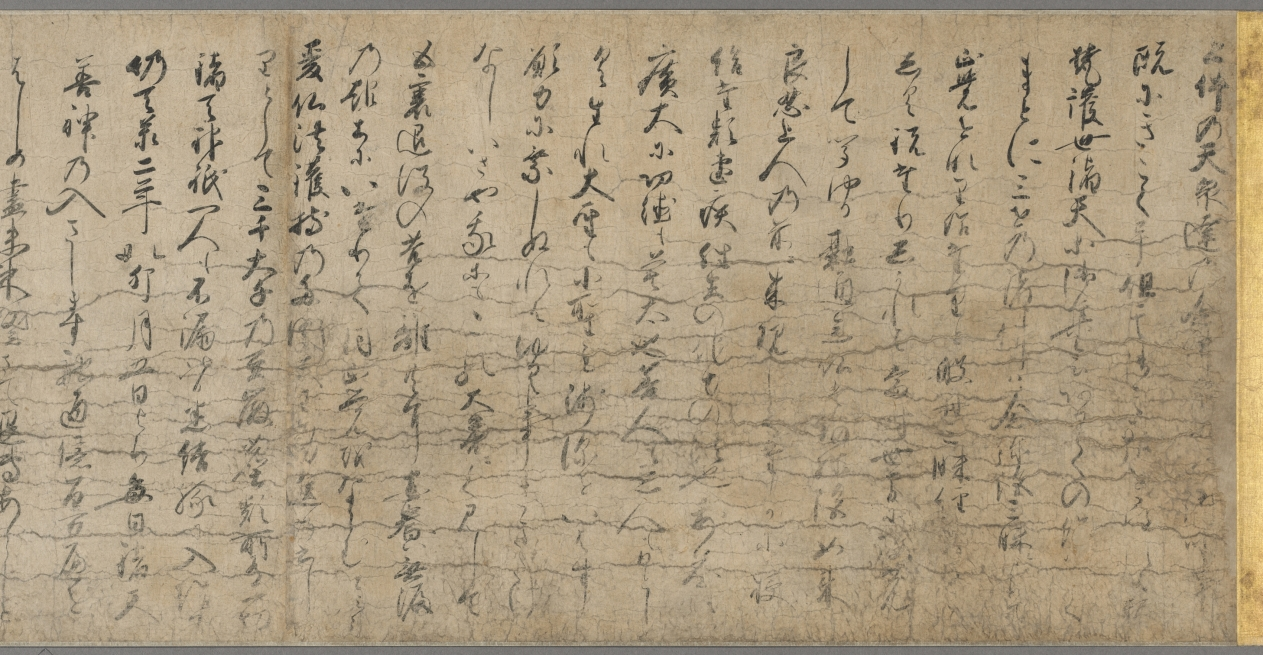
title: The Illustrated Miraculous Origins of the Yūzū Nenbutsu School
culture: Japan, Kamakura period (1185–1333)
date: early 1300s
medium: Handscroll; ink, color, and gold on paper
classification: Painting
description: This painting is the second of a set of two illustrated handscrolls. The first scroll depicts the biography of the Japanese Buddhist monk Ryōnin. This scroll begins with scenes of Ryōnin’s death and relates episodes illustrating the efficacy of following his teachings. Ryōnin asserted the total interconnectedness of all things and the spiritual benefit of chanting the name of the Buddha Amida for one another.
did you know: The other scroll from this two-scroll set belongs to the Art Institute of Chicago.